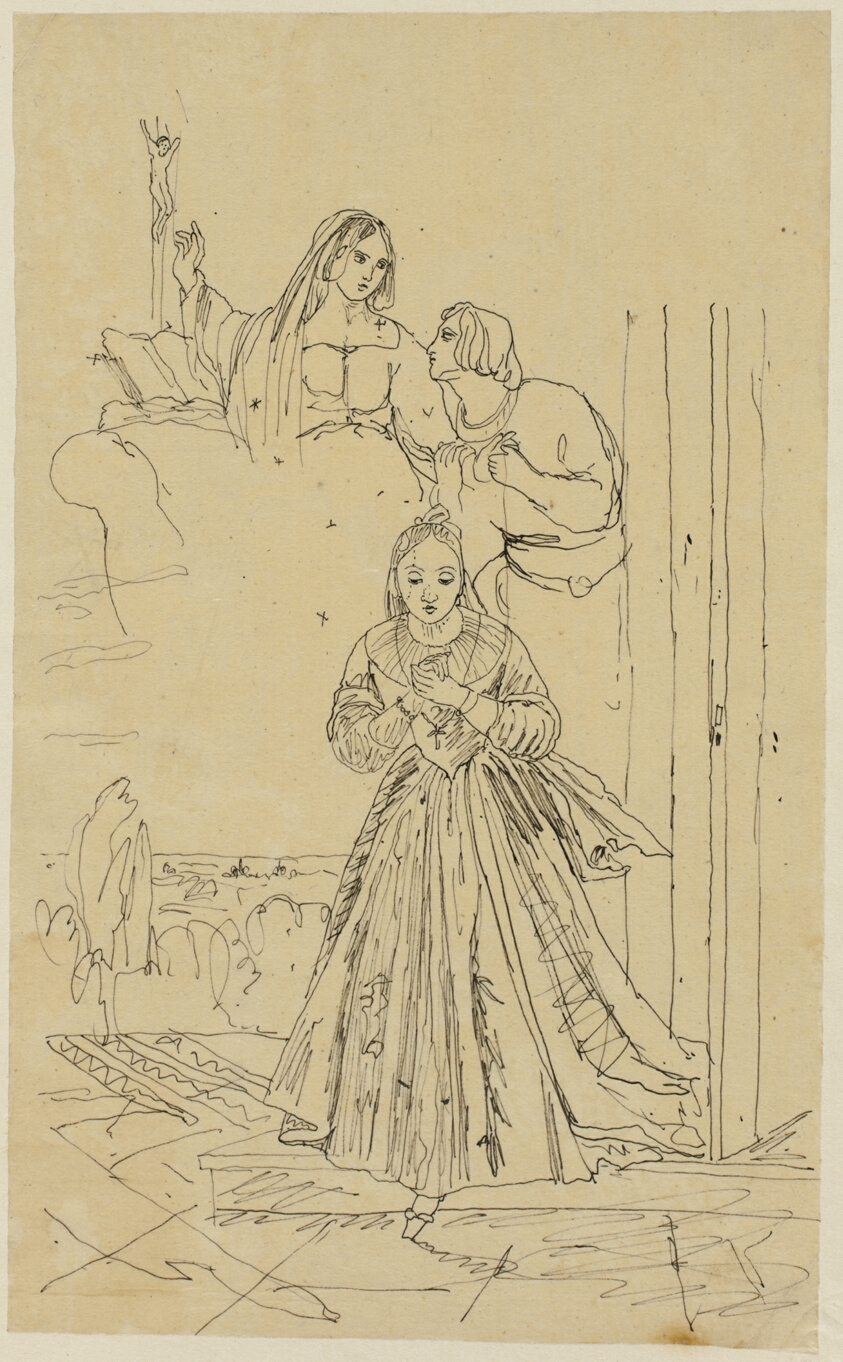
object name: Drawing and Watercolor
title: Refuge in Prayer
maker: Rodolphe Bresdin (French, 1825-1885)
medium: Pen and black ink, on tan tracing paper, laid down on ivory laid paper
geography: France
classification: pen and ink drawings; drawings (visual works); prints and drawing